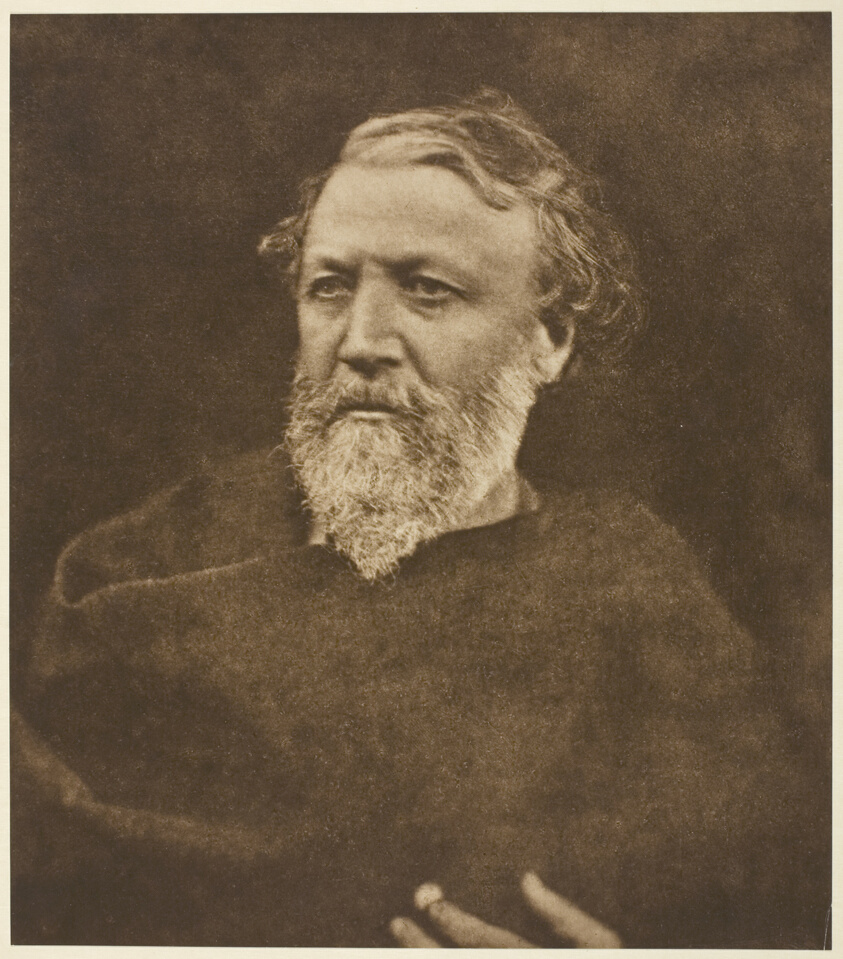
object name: Photograph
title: Robert Browning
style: 19th century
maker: Julia Margaret Cameron (English, 1815–1879)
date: 1865, printed 1875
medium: Carbon print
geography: England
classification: carbon print; pigment process; photographic process; photography; photograph